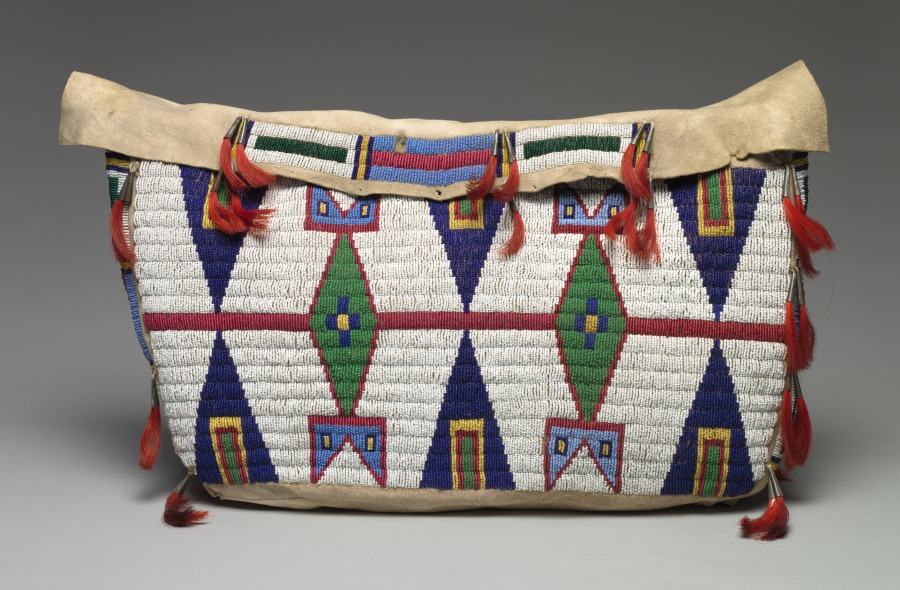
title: Storage Bag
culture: Native North America, Plains, Lakota (Sioux)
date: late 1800s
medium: Native-tanned hide, glass beads, dyed horsehair, tin cones, sinew thread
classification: Leather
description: Rectangular bags made of soft hide—known among early white traders as “possible bags” because they could hold “anything possible”—were used to store personal items inside the tipi, where they doubled as pillows. When encampments moved, the bags were carried on the side of a saddle, where their decoration could be admired.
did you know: Bags like this were used to store personal items inside the tipi, where they doubled as pillows.